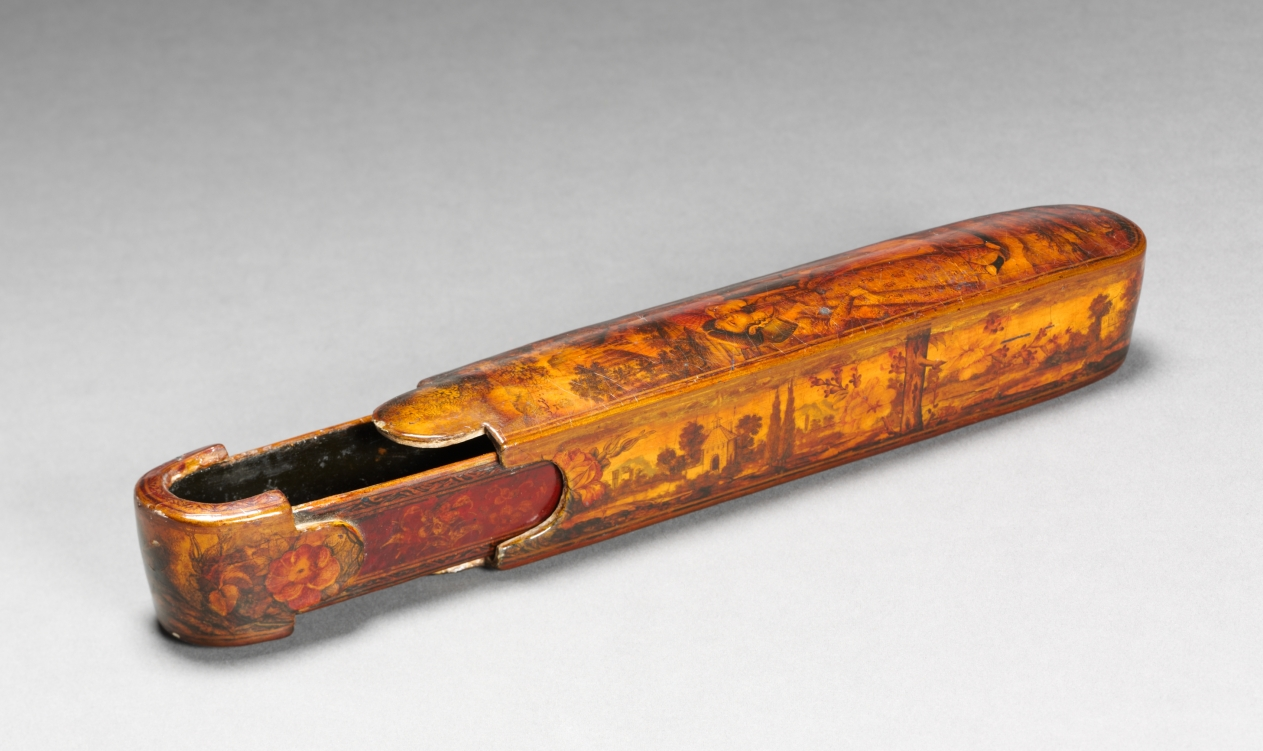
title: Pen and Ink Box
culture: Iran, probably Isfahan, Safavid period (1501–1722)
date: 1667–98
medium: Varnished lacquer and opaque watercolor over papier-mâché, ink, and copper alloy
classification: Lacquer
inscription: 1109